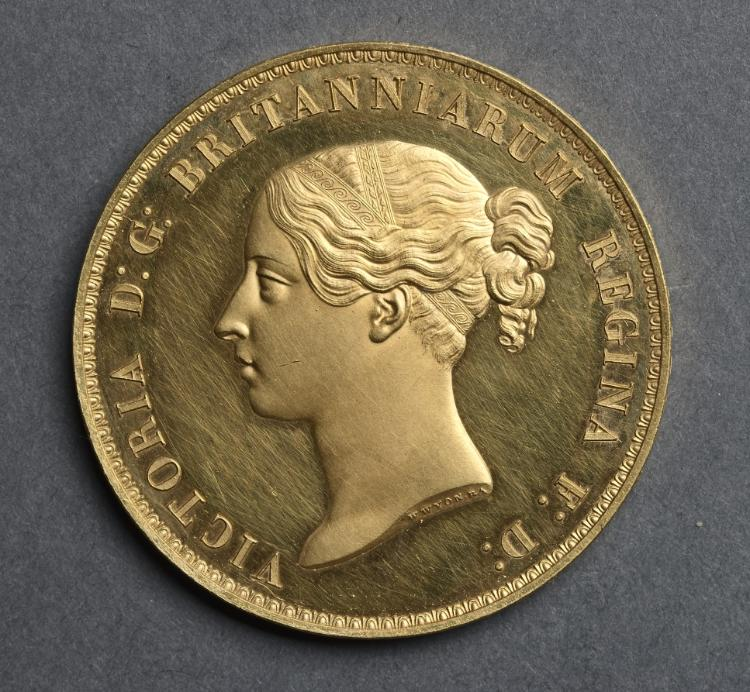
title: Five Pound Piece: Portrait of Queen Victoria (obverse)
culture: England, Victoria, 1837-1901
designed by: William Wyon (British, 1795–1851)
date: 1839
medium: gold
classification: Coins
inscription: VICTORIA D: G: BRITANNIARUM REGINA F: D: